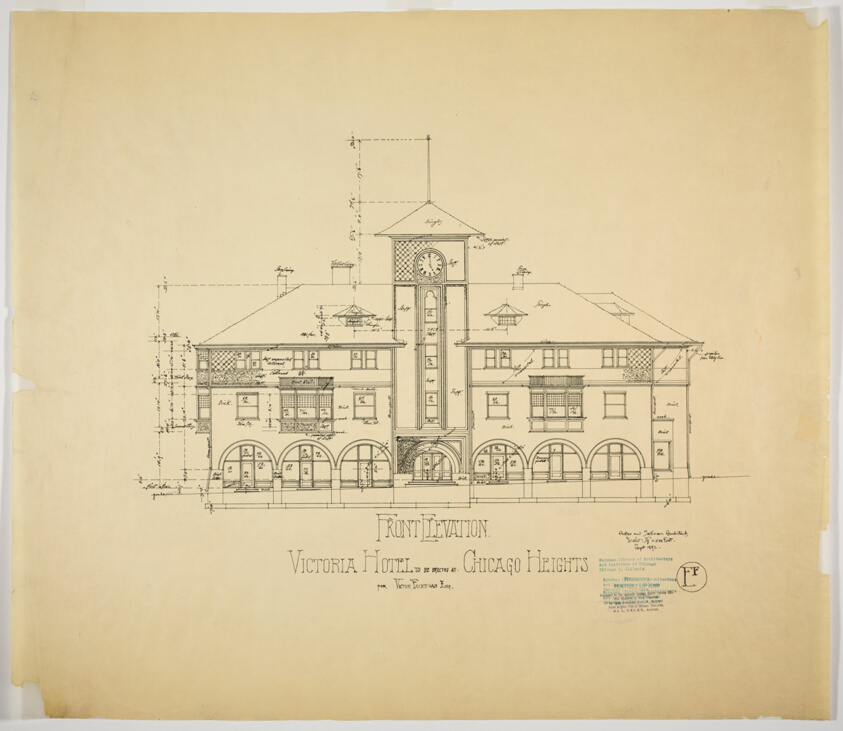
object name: Architectural Drawing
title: Victoria Hotel, Chicago Heights, Illinois, Front Elevation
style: 19th century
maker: Adler and Sullivan; American, 1883-1895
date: 1892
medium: Blackline and color Hectograph prints on paper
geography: Chicago Heights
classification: architectural drawing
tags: hotels, architecture, elevation, illinois